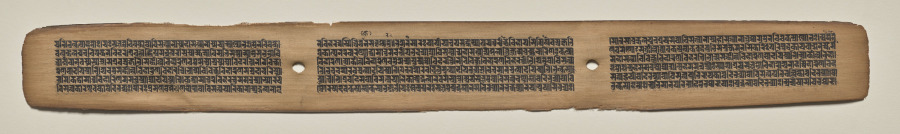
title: Text, Folio 139 (recto), from a Manuscript of the Perfection of Wisdom in Eight Thousand Lines (Ashtasahasrika Prajnaparamita-sutra)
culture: Eastern India, Bihar, Vikramashila Monastery. Painting: Nepal, Kathmandu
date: Sunday, September 14, 1119 (year 239 of the Newar Samvat in the month of Ashvina)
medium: gum tempera and ink on palm leaves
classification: Painting